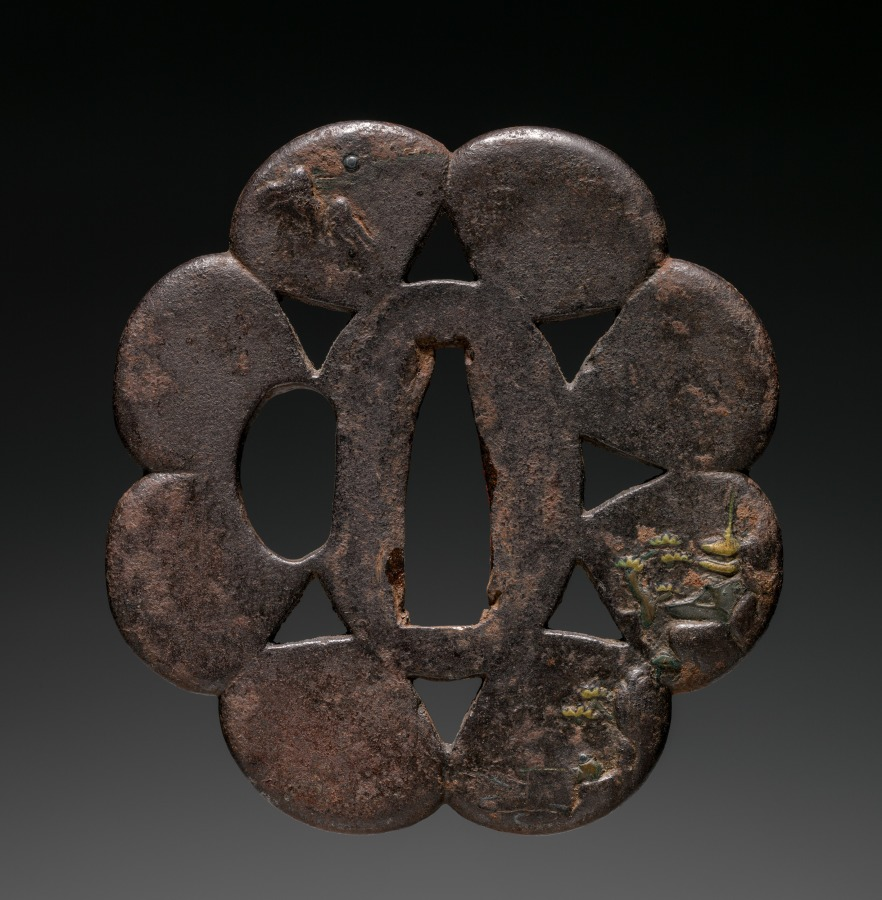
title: Sword Guard (Tsuba) with Chinese Landscape in Flower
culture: Japan, Edo period (1615–1868)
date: 1615–1868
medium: iron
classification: Arms and Armor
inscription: signed: 平安城住重光作